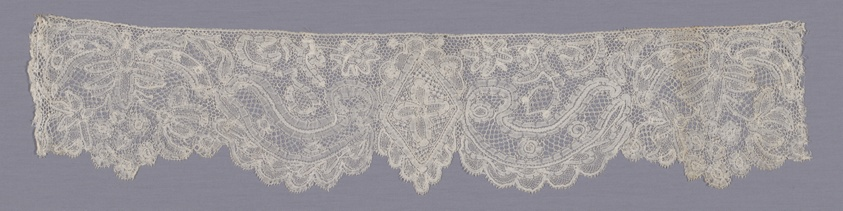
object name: Costume and Accessories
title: Border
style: 18th Century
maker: Belgium, Flanders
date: 1720/40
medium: Linen, bobbin part lace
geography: Flanders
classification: lace - bobbin; costume; costume accessory; costume - lace; lace; textile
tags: diamond shapes, cartouches, arabesque